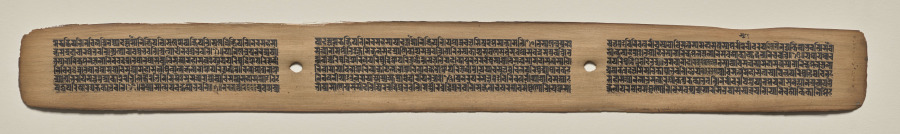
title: Text, Folio 15 (recto), from a Manuscript of the Perfection of Wisdom in Eight Thousand Lines (Ashtasahasrika Prajnaparamita-sutra)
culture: Eastern India, Bihar, Vikramashila Monastery. Painting: Nepal, Kathmandu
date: Sunday, September 14, 1119 (year 239 of the Newar Samvat in the month of Ashvina)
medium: gum tempera and ink on palm leaves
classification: Painting